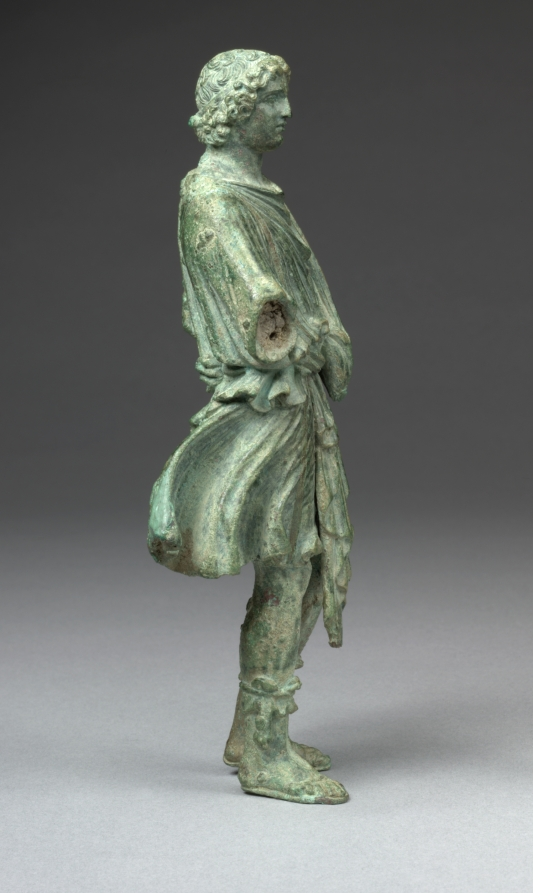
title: Lar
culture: Italy, Rome, Early Imperial period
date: 1–25 CE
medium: bronze with copper inlays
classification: Sculpture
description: This youthful bronze figure wears a short tunic with copper inlaid stripes and open-toed boots with animal-skin liners. The figure’s arms are missing, but based on other surviving examples, they likely held a libation dish and cornucopia. Even without these attributes, the figure can be identified through dress and stance as a type of Lar, or domestic deity, known as the Lar Familiaris (Household Lar), standing in a characteristic "quiet pose." Other types of Lares include the Lares Compitales and Lares Augusti (Lares of crossroads and of Augustus, respectively).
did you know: This statuette likely stood with other small bronzes in a household shrine called a lararium.